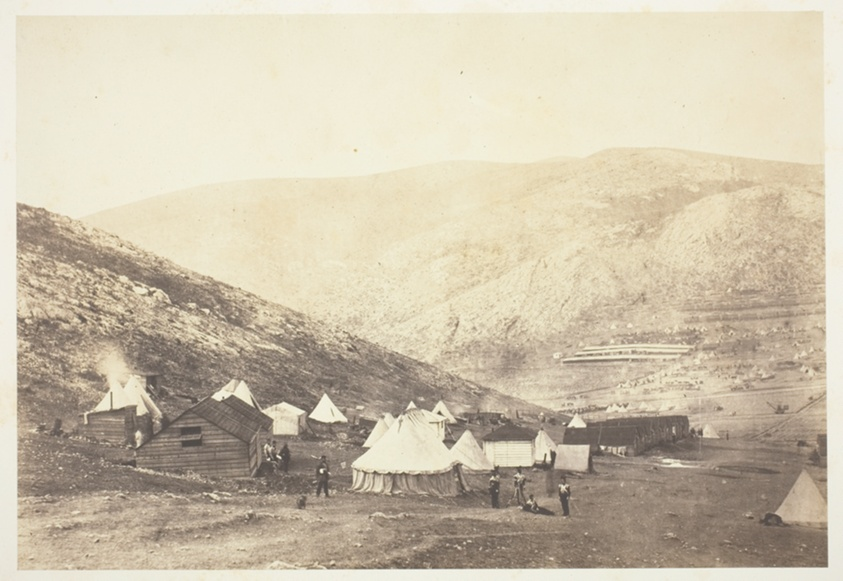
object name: Photograph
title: Encampment of the 71st Regiment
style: 19th century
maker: Roger Fenton (English, 1819–1869)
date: 1855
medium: Salted paper print, from the album "Photographic Pictures of the Seat of War in the Crimea" (1856)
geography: England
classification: salted paper print; photographic process; photography; photograph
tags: Collected by Hugh Edwards